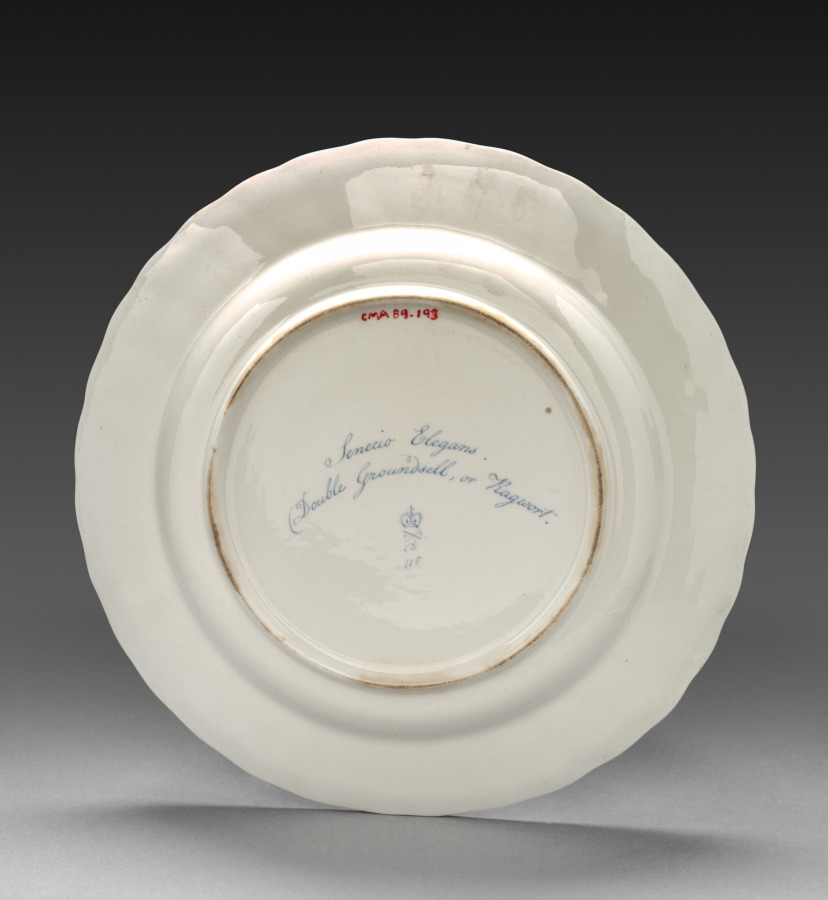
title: Plate from Dessert Service: Double Groundsell or Ragwort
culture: England, Derby, 18th century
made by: Derby (Crown Derby Period) (British)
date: c. 1800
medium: porcelain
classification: Ceramic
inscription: inscribed in blue on back: Senecia Elegans./Double Groundsell, or Ragwort./crown/crossed batons and dots/D/115.